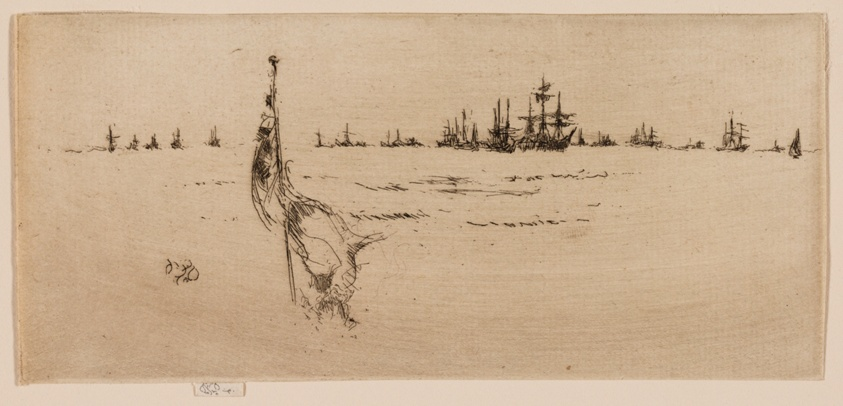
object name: Print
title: Dipping the Flag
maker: James McNeill Whistler (American, 1834-1903)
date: 1887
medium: Etching and drypoint in black ink on cream laid paper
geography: United States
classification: etching; print; prints and drawing; paper; drypoint